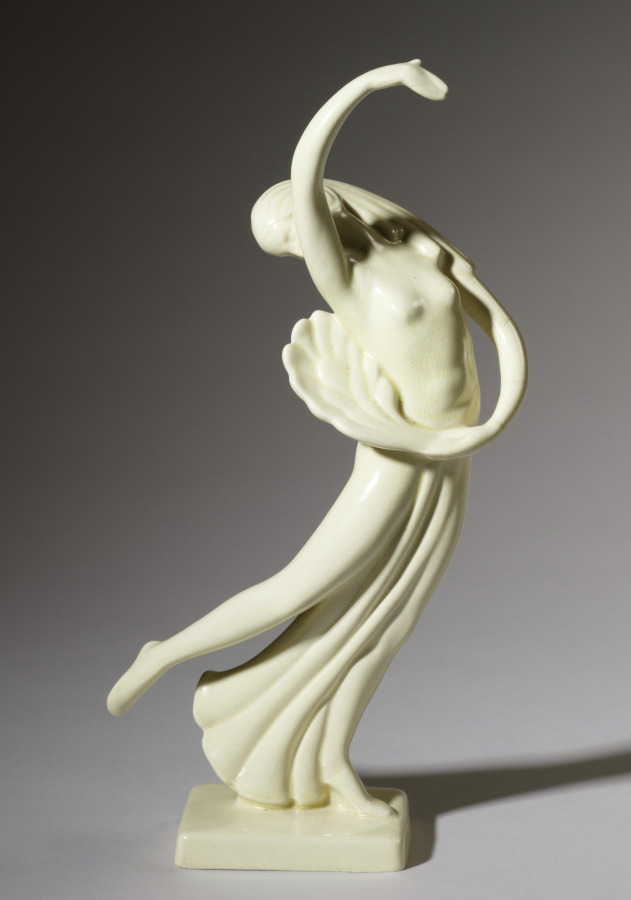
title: Fan Dancer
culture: America, Ohio, Cleveland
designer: Waylande Gregory (American, 1905–1971)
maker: Cowan Pottery Studio (America, Rocky River, Ohio, 1920–1931)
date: 1928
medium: glazed ceramic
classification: Ceramic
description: A stamp on the bottom of this ceramic sculpture indicates that it was produced at the Cowan Pottery studios. Although unsigned, it was most likely designed by Waylande Gregory, one of the studio’s premiere artists. In 1928 the studio’s founder, R. Guy Cowan, brought Gregory to Cleveland from Chicago, where he was developing a reputation as a talented young sculptor. Cowan Pottery, located in Lakewood (1912–17) and later Rocky River (1919–32), Ohio, began producing ceramic sculpture in the mid-1920s, launching its most fertile creative period. Cowan employed a large team of talented artists at the studio, including Walter Sinz, Thelma Frazier Winter, and Viktor Schreckengost. The studio brought national fame to Cleveland ceramists, but was forced to close due to economic circumstances in 1932.